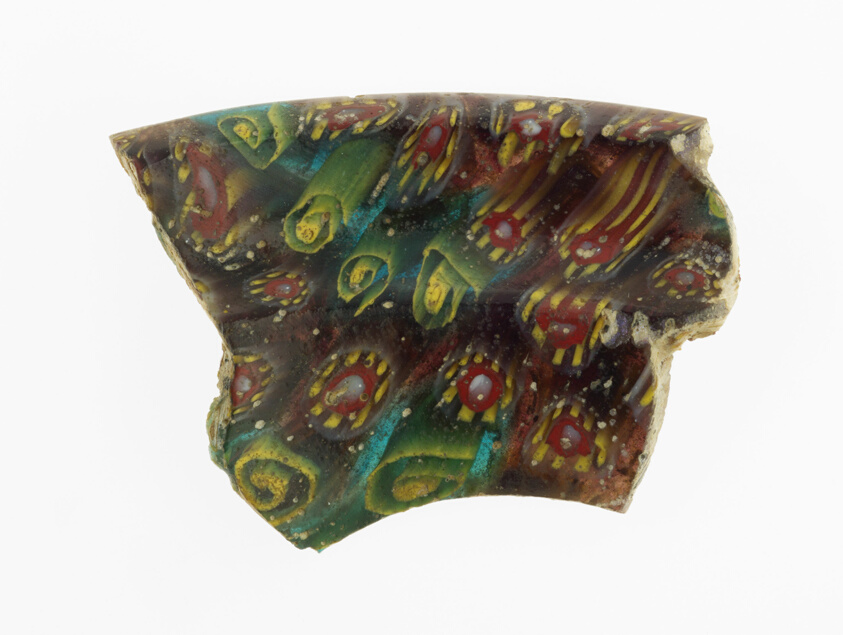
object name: Decorative Arts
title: Fragment of a Cup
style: roman (ancient, style or period), ancient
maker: Roman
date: 1st century BCE–1st century CE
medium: Glass, mosaic glass technique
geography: Italy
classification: fragment; drinking vessel; decorative arts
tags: decoration